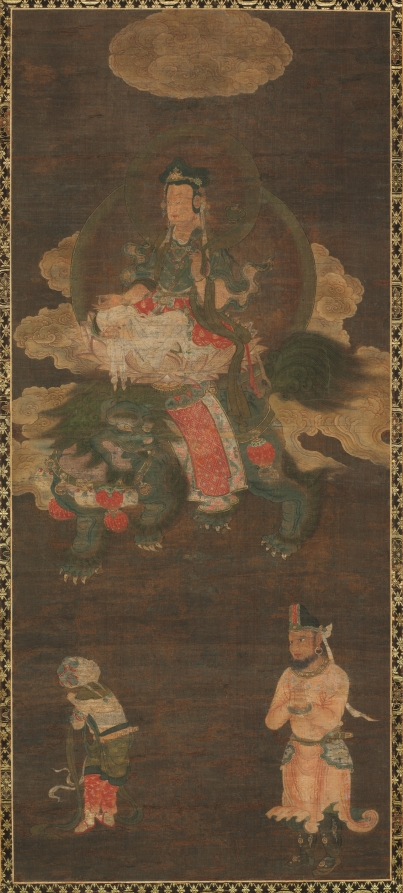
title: Shakyamuni Triad: Buddha Attended by Manjushri and Samantabhadra (Bodhisattva with Lion)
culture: China, Fuzhou, Fujian Province, Yuan dynasty (1271-1368)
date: late 1300s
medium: Hanging scroll; ink and color on silk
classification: Painting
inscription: Inscription at the bottom of the central scroll reads: "Da Song Fuzhou fu…(Fuzhou prefecture of the great Song)."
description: This triptych is a rare example of Yuan Buddhist painting. It depicts the historic Buddha Shakyamuni flanked by two attending bodhisattvas, Manjushri (the bodhisattva of wisdom, riding a lion) and Samantabhadra (the bodhisattva of universal virtue, riding an elephant). Below them are others seeking enlightenment: two disciples of the Buddha (Ananada and Kasyapa), two non-Chinese people, a boy with topknots, and a female worshiper. The clouds above and around the divine beings form one scene that illustrates Shakyamuni’s sermon from the Lotus Sutra. This text became an important basis for Buddhist faith throughout East Asia and was central to the Mahayana school of Buddhism.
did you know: Manjushri, the bodhisattva of wisdom, leads the child Sudhana on his quest for enlightenment.